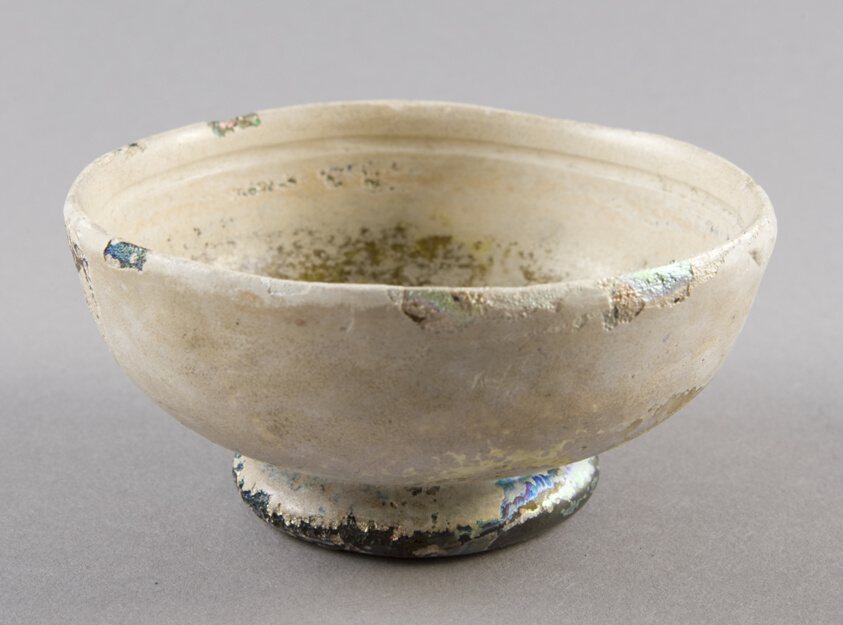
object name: Vessel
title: Bowl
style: syrian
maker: Roman, Levant or Syria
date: 2nd-6th century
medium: Glass, blown technique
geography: Syria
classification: bowl; glass; vessel; ancient art